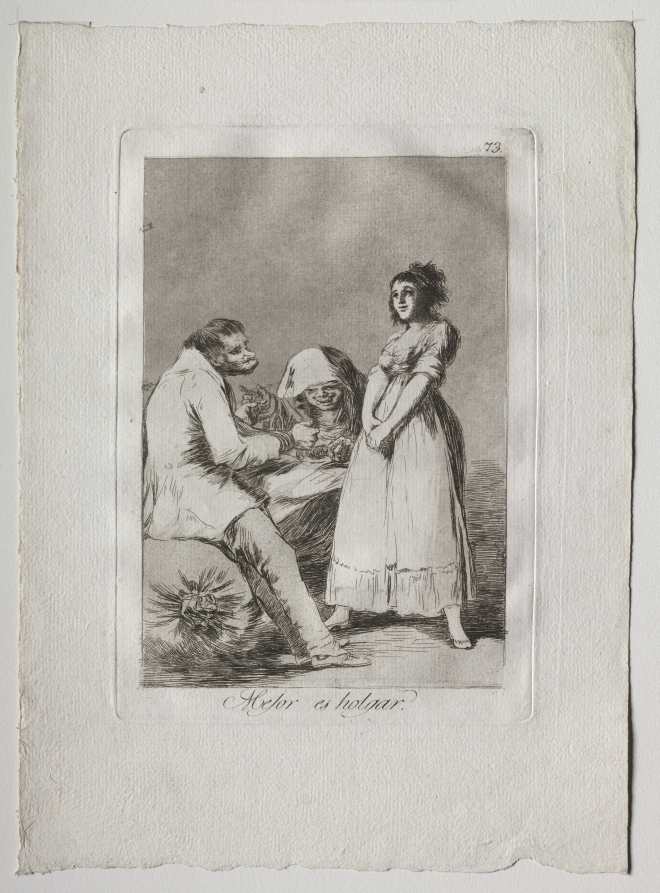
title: It is Better to be Lazy, Plate 73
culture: Spain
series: Los Caprichos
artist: Francisco de Goya (Spanish, 1746–1828)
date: 1799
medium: etching and aquatint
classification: Print